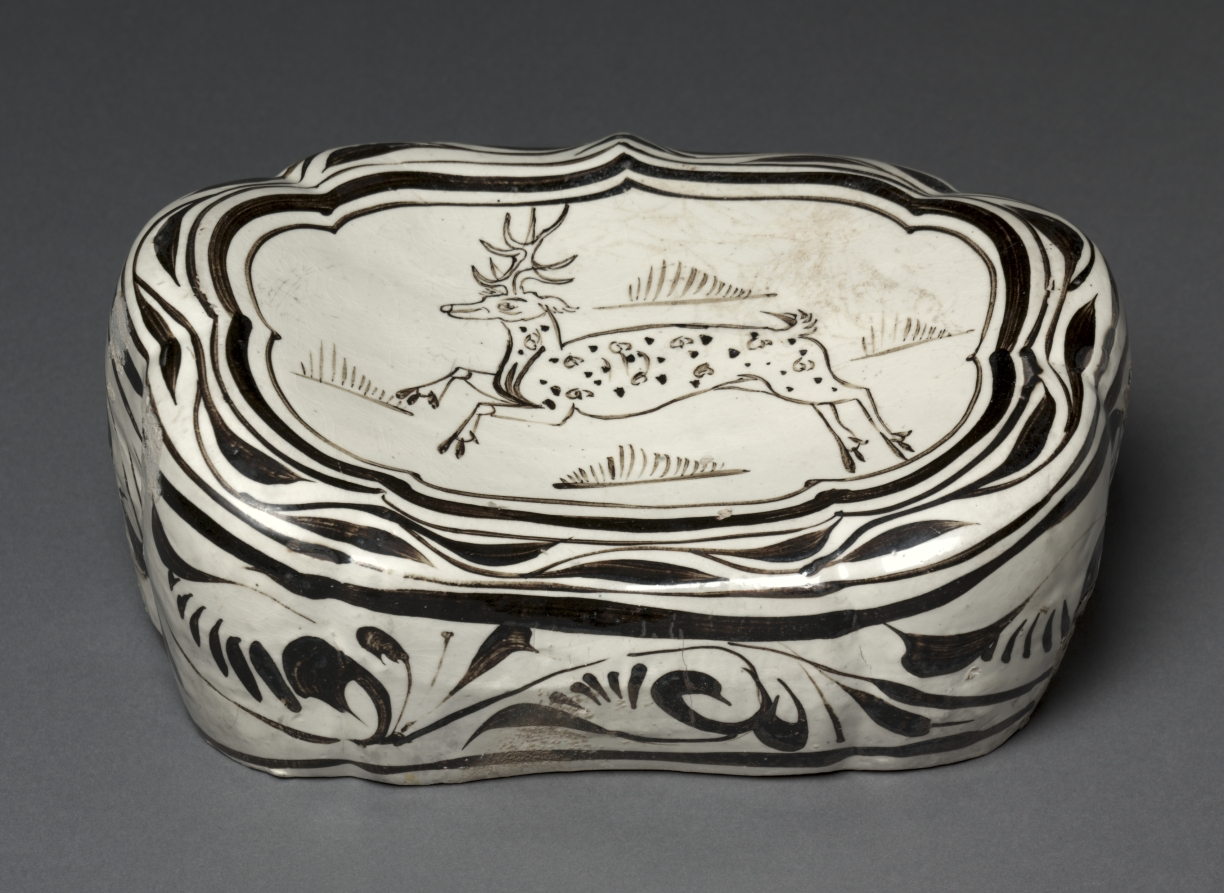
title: Pillow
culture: China, Song dynasty (960-1279) - Yuan dynasty (1271-1368)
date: 1100s–1200s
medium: Gray stoneware with underglaze painted decoration, Cizhou ware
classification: Ceramic